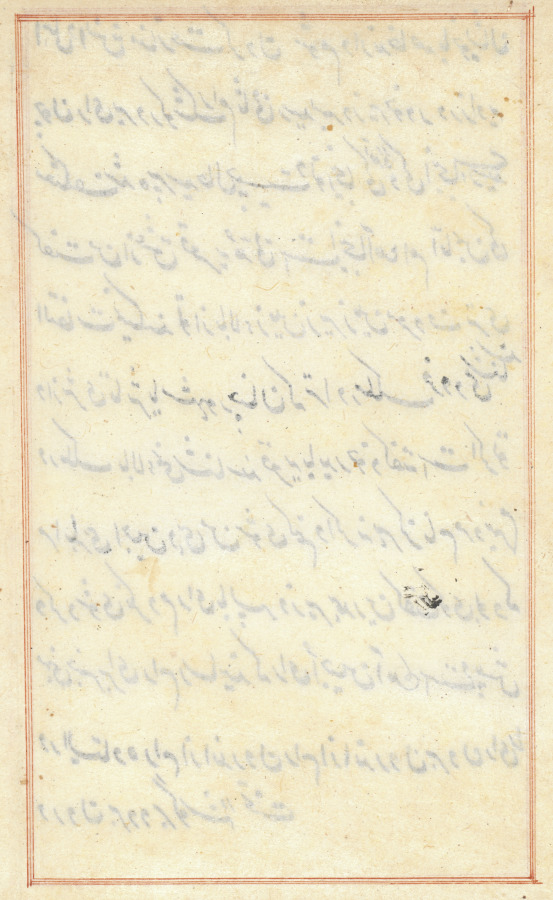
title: Page from Tales of a Parrot (Tuti-nama): text page (blank)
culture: Mughal India, court of Akbar (reigned 1556–1605)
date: c. 1560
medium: gum tempera, ink, and gold on paper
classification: Painting